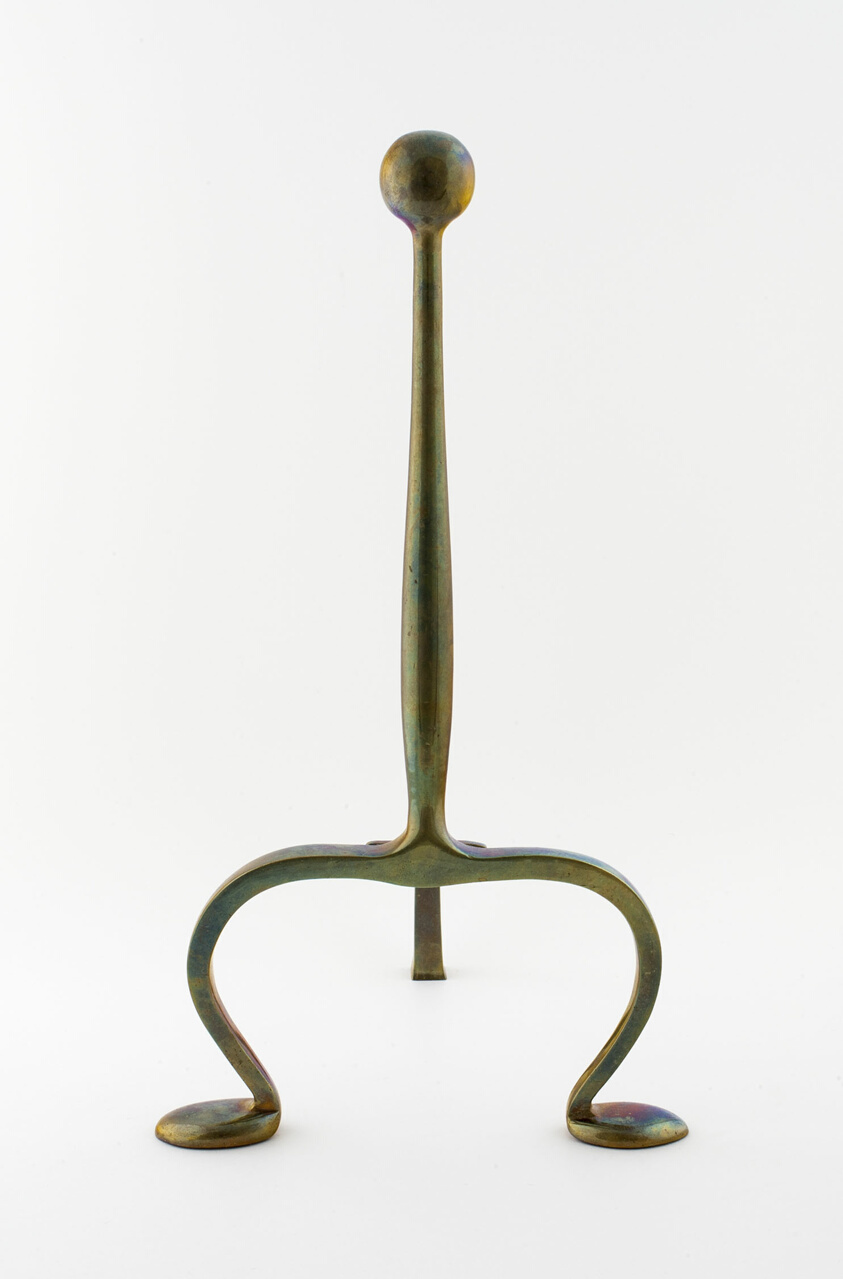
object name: Metalwork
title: One of a Pair of Andirons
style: Arts and Crafts Movement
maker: Designed by Charles Francis Annesley Voysey; English, 1857-1941; Probably made by Thomas Elsley Ltd.; London, c. 1880-1930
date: c. 1900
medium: Brass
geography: England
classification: fireplace equipment; european decorative arts; metalwork